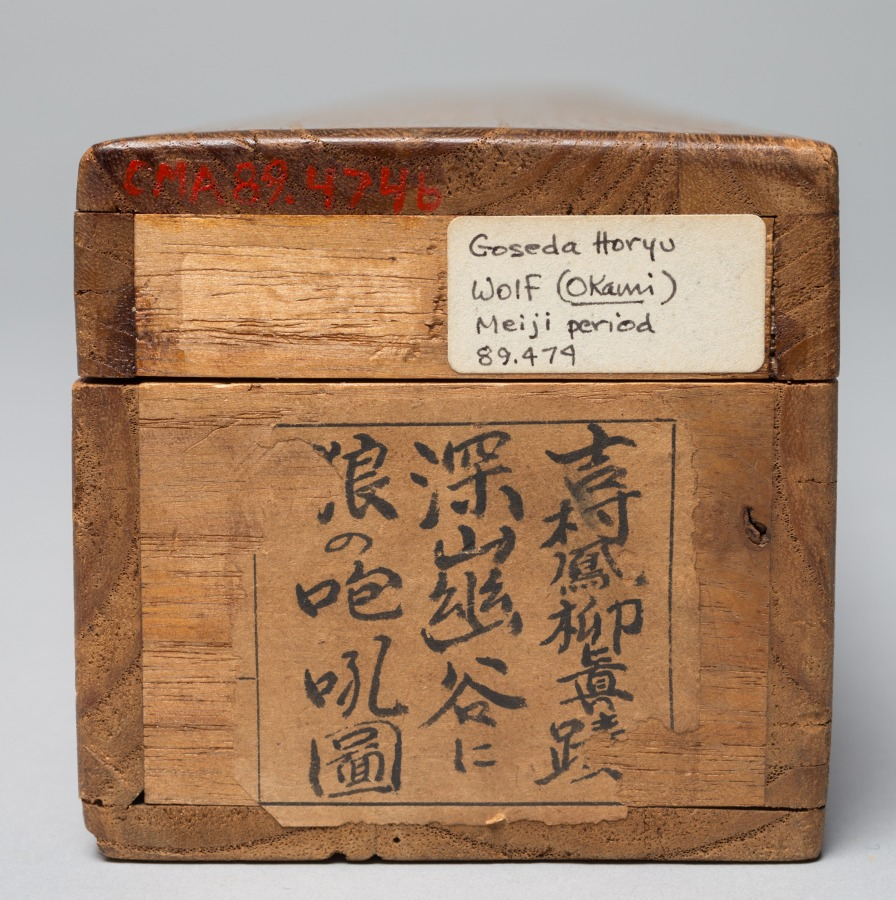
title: Howling Wolf in a Deep Mountain Valley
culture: Japan, Taishō period (1912–26)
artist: Yoshimura Hōryū (Japanese, 1874–1950)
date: 1912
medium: Hanging scroll; ink and color on silk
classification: Painting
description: A wolf howls beneath the tall pines in a misty landscape. The painter was born in the bustling city of Osaka in the Kansai region. He studied with Mori Jihō (1818–1891) and admired the Maruyama school of painters. He was especially gifted at depicting deer, monkeys, tigers, weasels, and other animals.